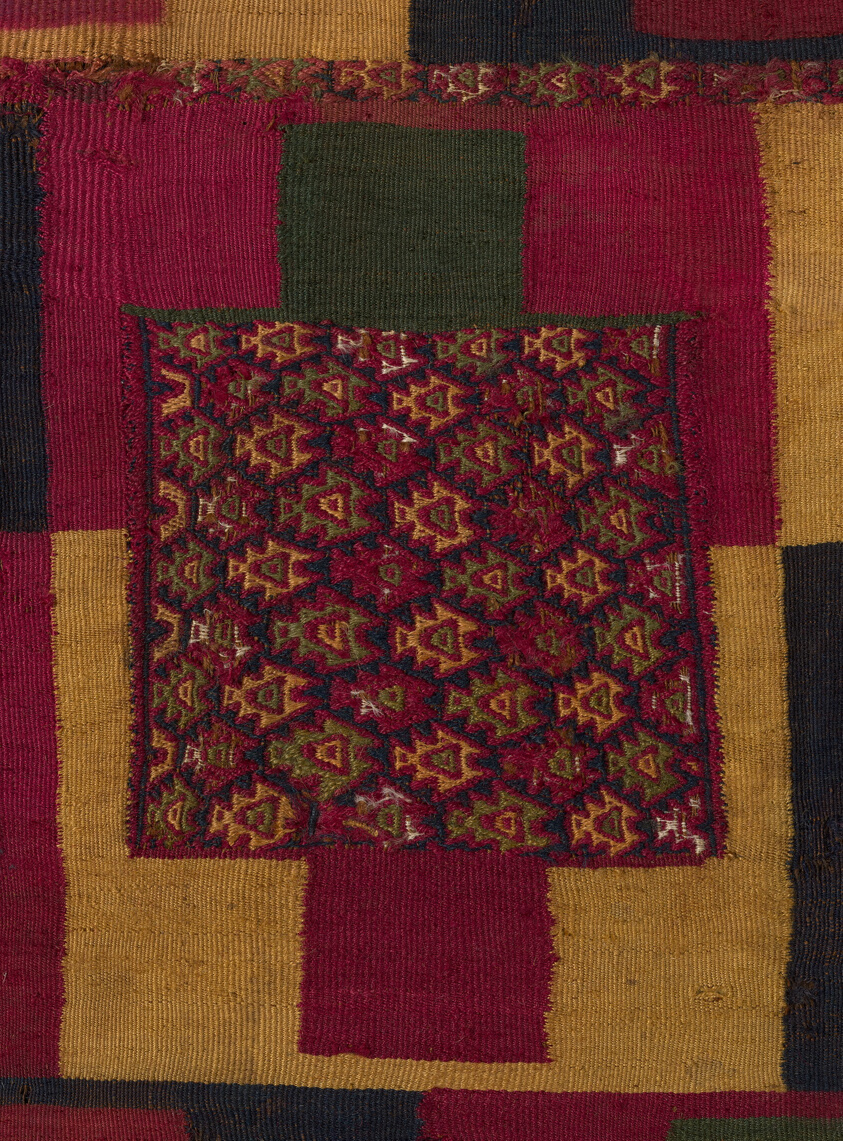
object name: Costume and Accessories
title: Poncho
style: Chuquibamba, peruvian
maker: Chuquibamba region (south coast, Peru)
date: 1300/1550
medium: Camelid wool, single interlocking tapestry weave and five-color complementary weft weave with center band of complementary weft weave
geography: Peru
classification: textile; weaving; costume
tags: geometric, status, offering, birds, fish